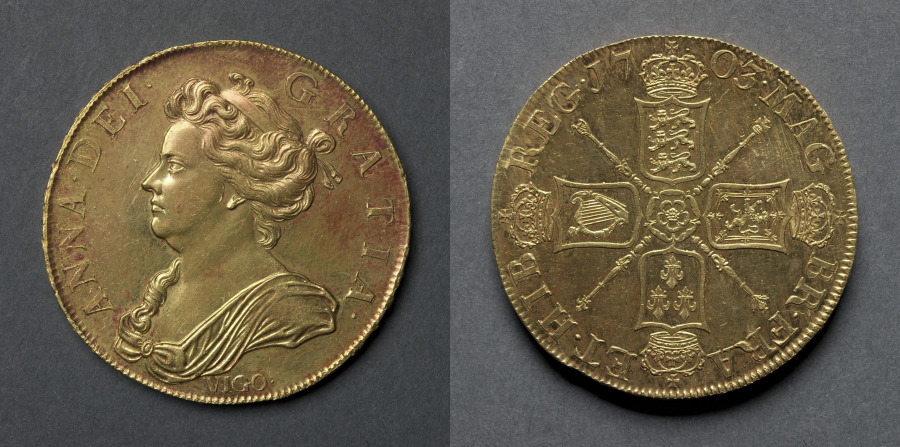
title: Five Guineas: Anne (obverse); Shields and rose (reverse)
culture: England, Anne, 1702-1714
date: 1703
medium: gold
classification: Coins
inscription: ANNA . DEI . GRATIA; below: VIGO.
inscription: MAG BR. FRA ET. HIB REG 1703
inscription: DECUS ET TUTAMEN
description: The coinage during Anne's reign remained fairly constant to the designs inaugurated in 1662. Before the Act of Union with Scotland (1706), the arms of England and Scotland remained separate, as shown. After the act the two arms were conjoined on one shield. The word Vigo denotes that the coins were struck from gold captured from the Spanish at the Battle of Vigo Bay (1702). Although silver coins bearing the Vigo inscription are less rare, the three gold denominations bearing the symbol are all extremely rare.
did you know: Of the five guineas struck for circulation, this type is the rarest.